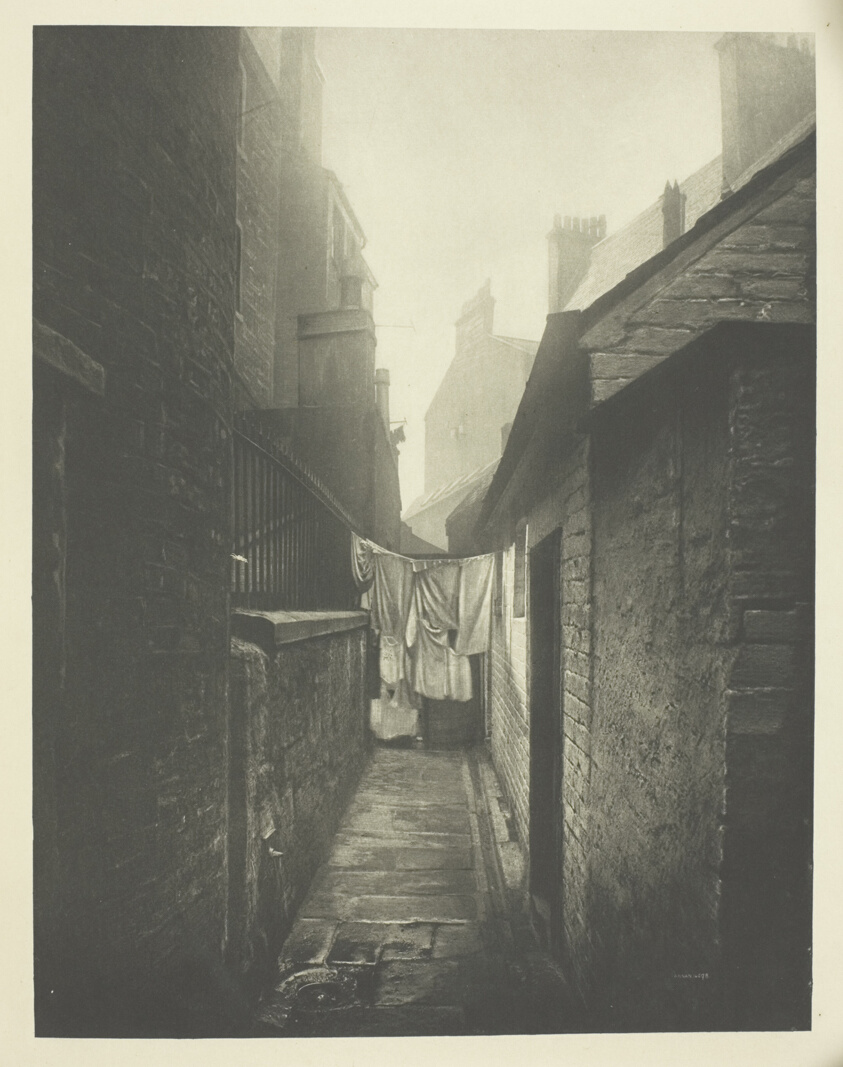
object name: Photograph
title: Close No. 11 Bridgegate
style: 19th century, Pictorialism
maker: James Craig Annan (Scottish, 1864-1946)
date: 1897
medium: Photogravure, plate 43 from the book "The Old Closes & Streets of Glasgow" (1900)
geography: Scotland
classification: photograph; photography